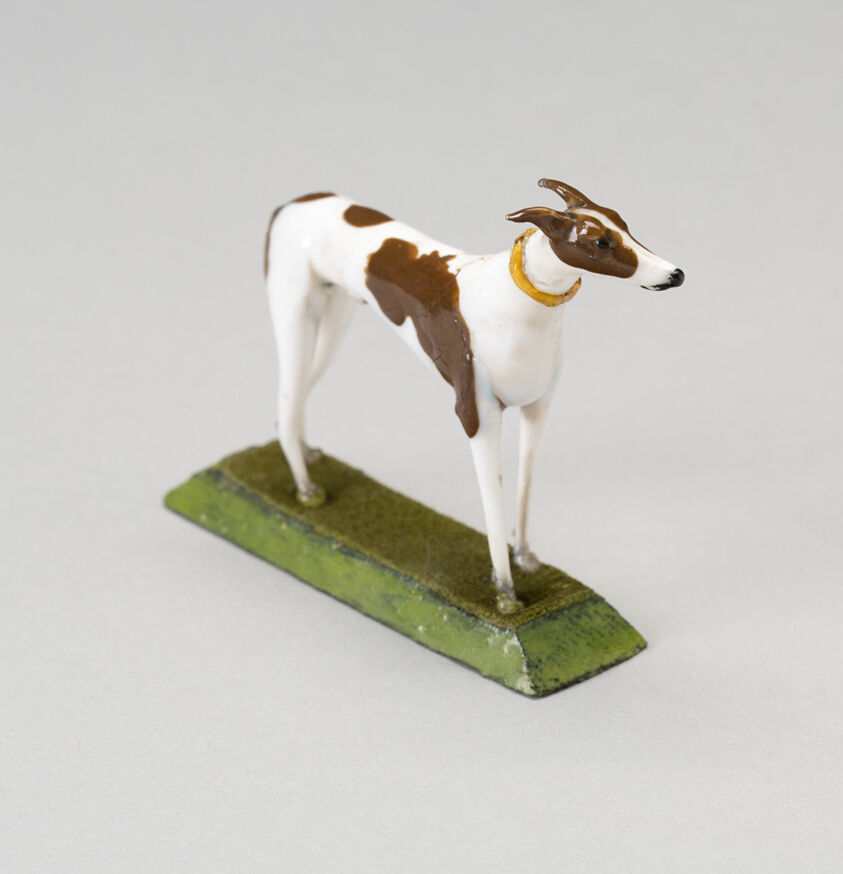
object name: Glass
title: Dog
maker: Nevers, France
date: 18th century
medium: Glass; lampwork (verre de Nevers), metal armature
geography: France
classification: decorative object/ornament; lampwork; glass; european decorative arts